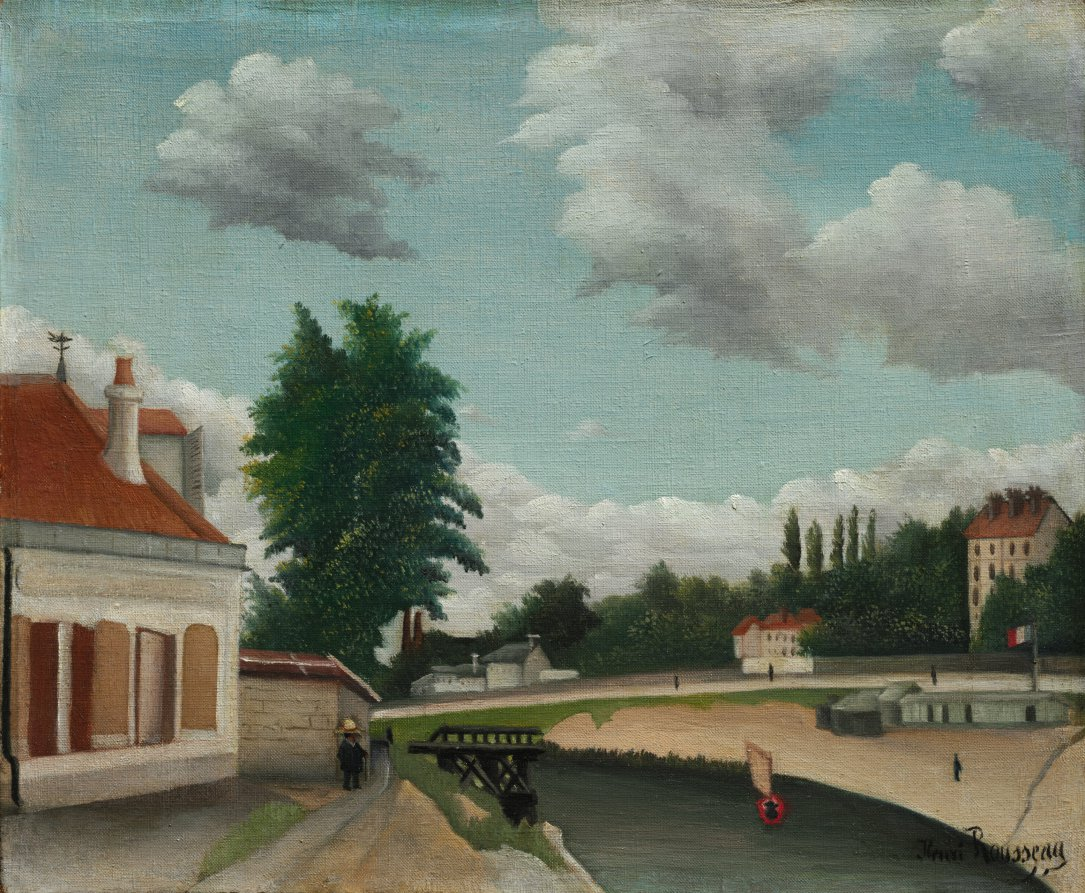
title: Outskirts of Paris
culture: France, late 19th Century-early 20th Century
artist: Henri Rousseau (French, 1844–1910)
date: c. 1897–1905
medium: oil on fabric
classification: Painting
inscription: Signed lower right: Henri Rousseau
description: In addition to his large jungle scenes, Rousseau also painted small landscapes, including this view of a river or canal on the outskirts of Paris. While retaining a sharp, detailed rendering of objects, Rousseau has abandoned the flat tonality of his earlier works for more blended modeling and freer brushwork. The volumes of the clouds, trees, and houses occupy distinct areas in space, revealing the serenity of an organized world. A self-taught painter who, at the age of 41, quit his job in the Paris municipal toll or tax service to devote himself entirely to art, Rousseau was widely admired by avant-garde artists for his intuitive sense of design and inventive subjects.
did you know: Rousseau once said to Picasso: "We are the two greatest artists of this era, you in the Egyptian style, I in the modern style."